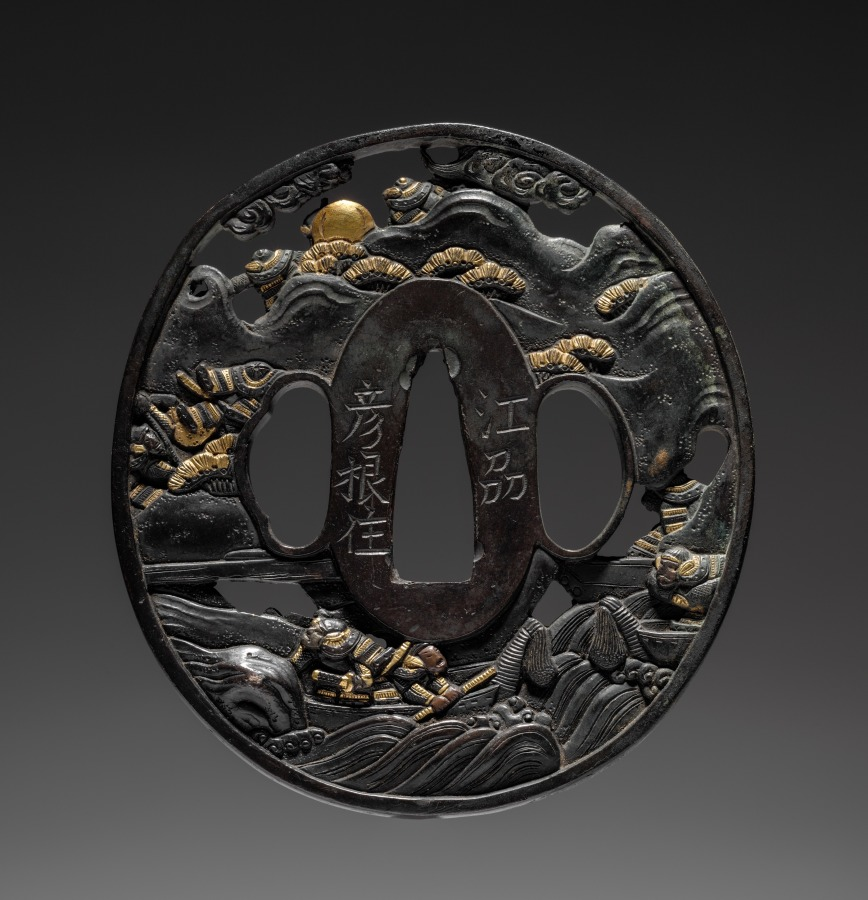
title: Sword Guard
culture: Japan, Edo period (1615–1868)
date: mid-1600s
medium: metal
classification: Arms and Armor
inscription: Signature: Soheishi-nyudo Soten made